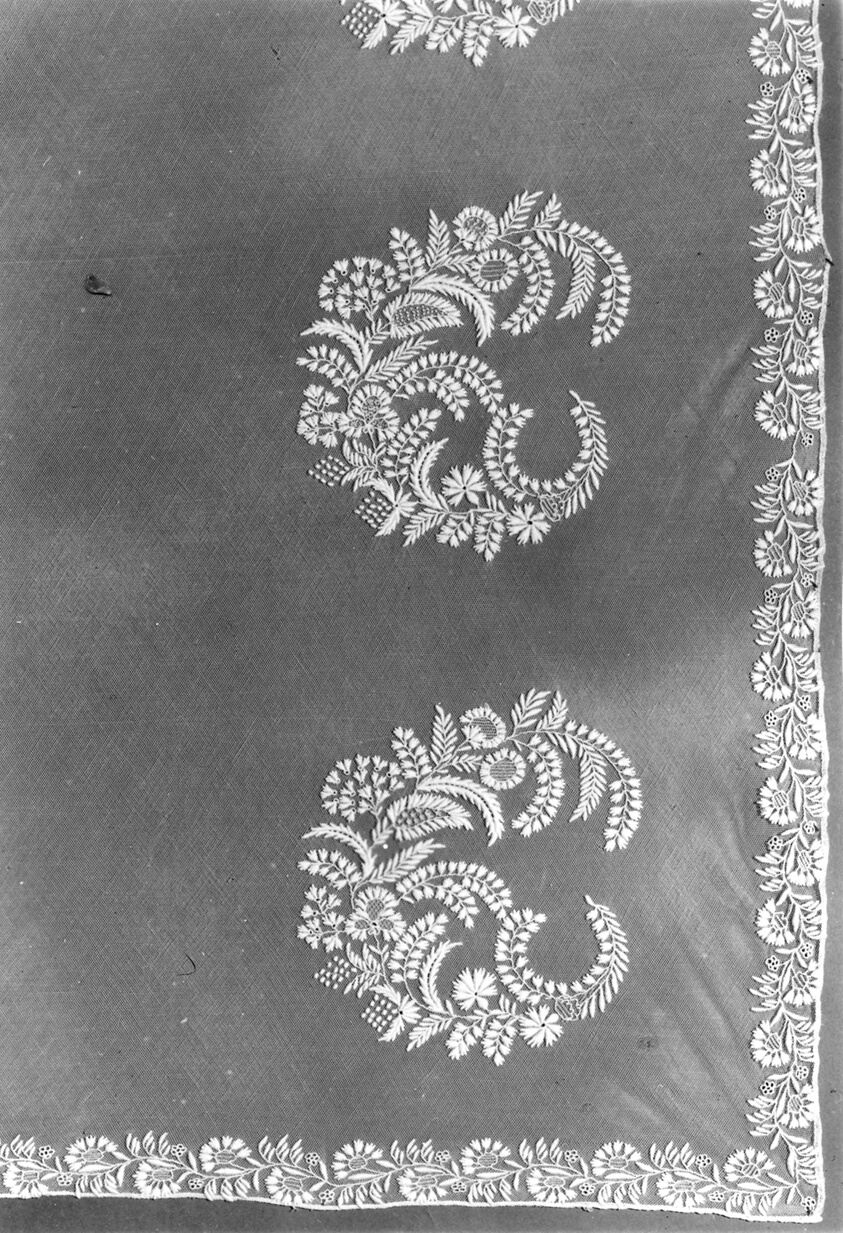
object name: Textile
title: Bonnet Veil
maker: Probably France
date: 1830s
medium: Cotton, machine-made net; embroidered in cross, half cross, flat, overcast, satin, padded satin, and wave filling stitches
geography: France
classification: textile; needlework (visual works)